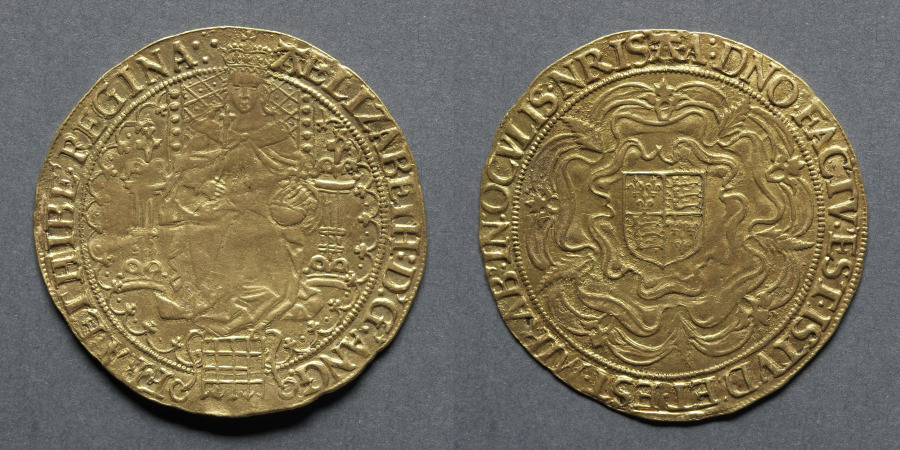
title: Sovereign of Thirty Shillings: Elizabeth I (obverse); Shield of Arms on Tudor Rose (reverse)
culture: England, Elizabeth I, 1558-1603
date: 1583–1603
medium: gold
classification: Coins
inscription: ELIZABETH D G ANG FRA ET HIB REGINA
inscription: A DNO FACTV EST ISTVD ET EST MIRAB IN OCVL IS NRIS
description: A point of interest of this very rare piece is the initial mark. The mark, in the shape of a crosslet, and visible at the start of the inscription, dates the die to 1560–61. However here it has been over stamped with another mark, an A, used in 1583–85. This indicates the reuse of the die of the first coinage during the third coinage period. The restoration of the coinage to its proper fineness was completed during this reign. In 1562 a proclamation had been issued reducing the value of all coinage by one third. It was restored to full value again in 1572, when a new coinage was ordered at the old values. There would still be economic troubles ahead, however.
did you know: The denomination of this coin was so high that as a piece of money it was meant only for the aristocracy or royalty.